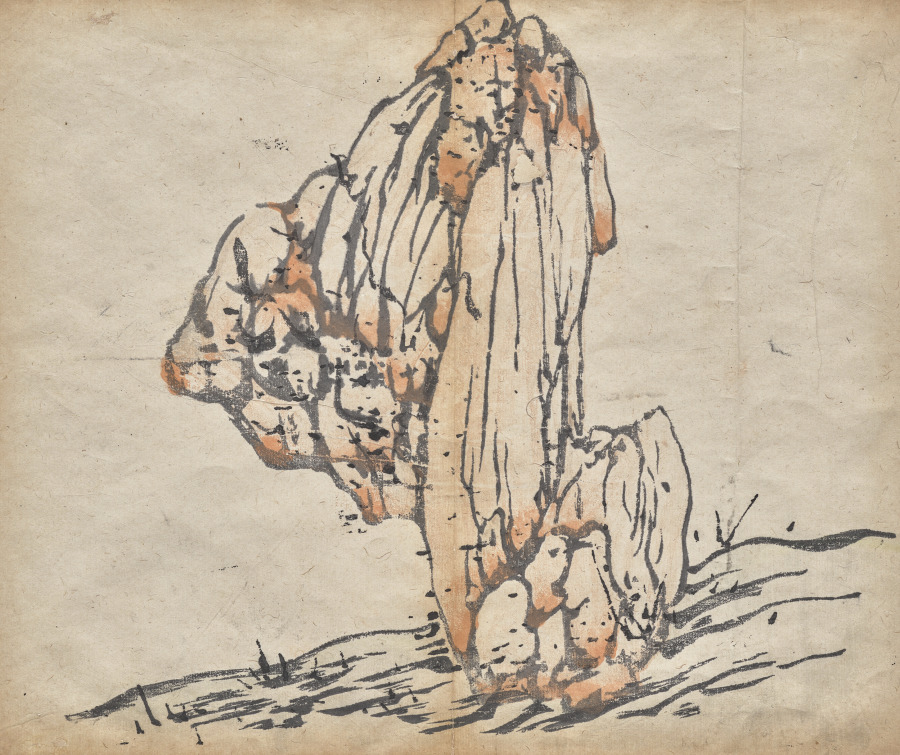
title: Untitled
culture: China, Ming dynasty (1368–1644)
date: 1625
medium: color woodblock print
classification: Print